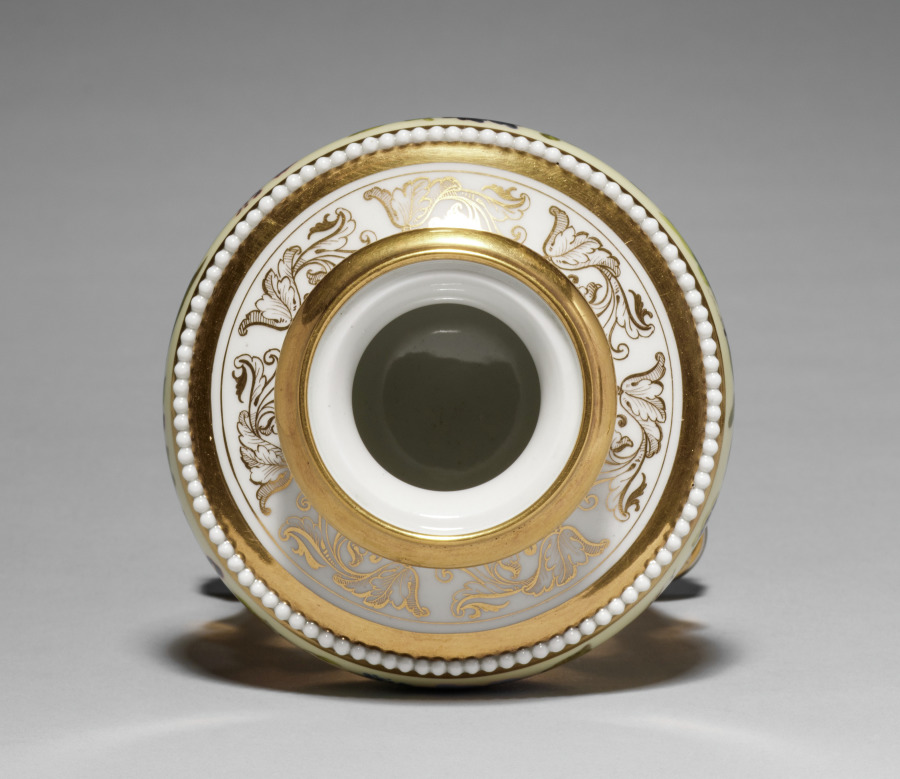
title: Urn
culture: England, Worcester, 19th century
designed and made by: Flight, Barr and Barr (British)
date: c. 1815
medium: artificial porcelain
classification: Ceramic